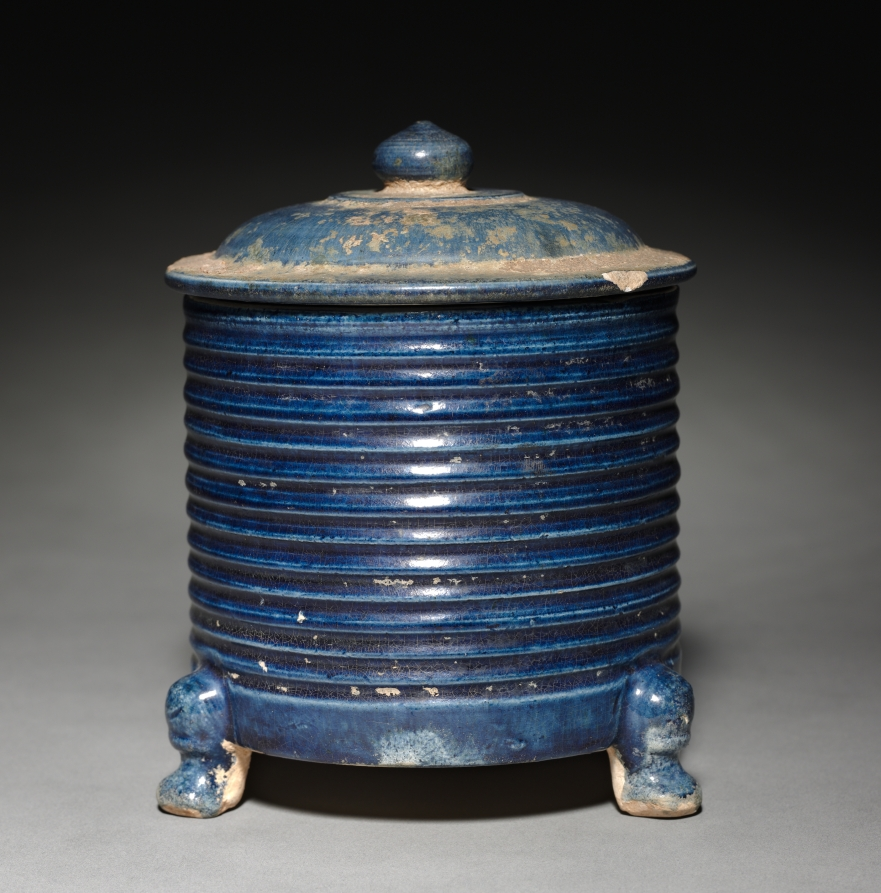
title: Covered Jar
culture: China, Tang dynasty (618–907)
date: early 700s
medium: glazed earthenware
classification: Ceramic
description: This covered cylindrical jar with three animal feet is lavishly covered with a cobalt blue glaze in the exterior and an amber glaze in the interior. Of the colored lead glazes of sancai (three-color) ware, blue was preeminent and precious. Imported cobalt from Persia (Iran, Afghanistan) was used as a glaze colorant that yields a rich, brilliant blue of considerable splendor.